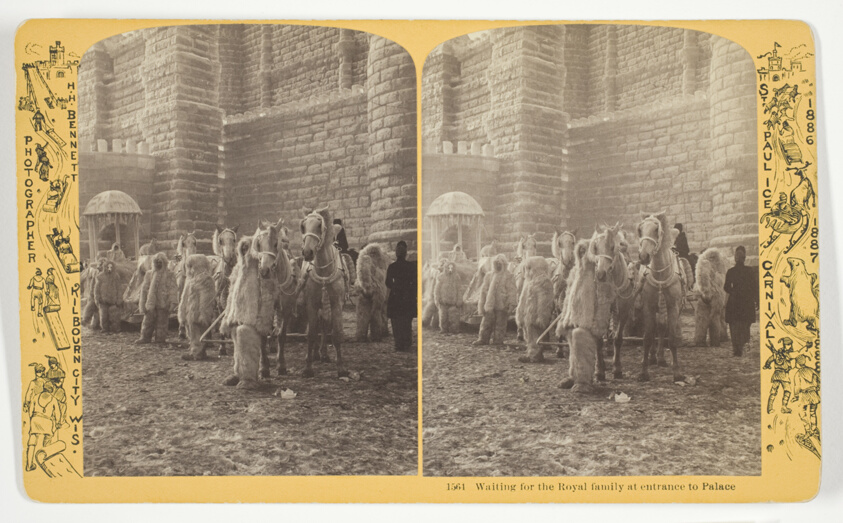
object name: Photograph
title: Waiting for the Royal family at entrance to Palace, No. 1564 from the series "St. Paul Ice Carnival"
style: 19th century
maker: Henry Hamilton Bennett (American, born Canada, 1843-1908)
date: 1886/88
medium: Albumen print, stereo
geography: Wisconsin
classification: photography; photograph; albumen silver print; stereograph (albumen)